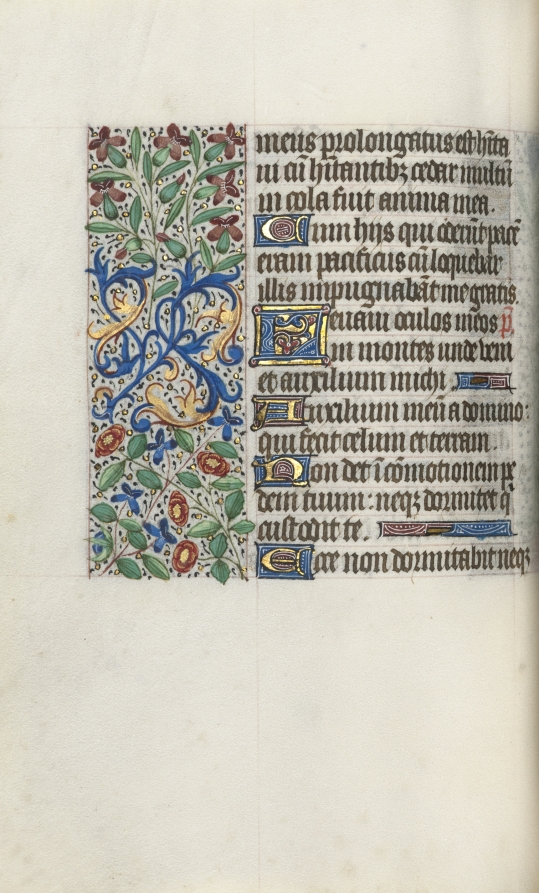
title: Book of Hours (Use of Rouen): fol. 61v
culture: France, Rouen, 15th century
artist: Master of the Geneva Latini (French, active Rouen, 1460–80)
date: c. 1470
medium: ink, tempera, and gold on vellum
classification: Bound Volume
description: In the late 1400s and early 1500s Rouen was an established and important center of book production. The city’s cathedral had a wealthy chapter that spent large sums of money to commission books and to maintain its extensive library. The stationers and booksellers would have likely been concentrated in or near the cathedral precinct. This artist, named after a manuscript now in Geneva, was Rouen’s principal illuminator during the second half of the 1400s.